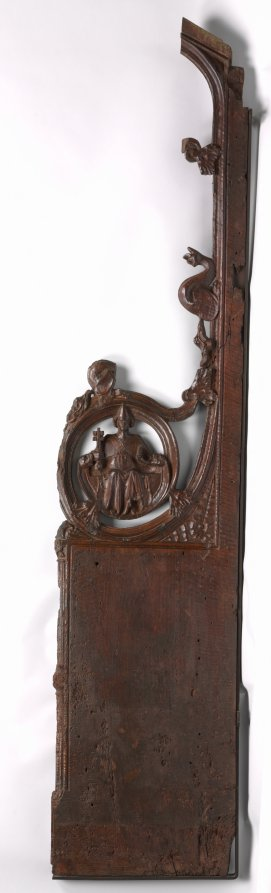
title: Panel from a Choir Stall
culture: Spain, Catalonia, Monastery of Pedralbes, 14th century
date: c. 1330–1340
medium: walnut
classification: Furniture and woodwork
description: The large panel shown here was probably the end panel of a stall that faced another across the choir of a Gothic church. The panel depicts a seated pope, possibly Urban IV, who holds the keys of St. Peter and a book.